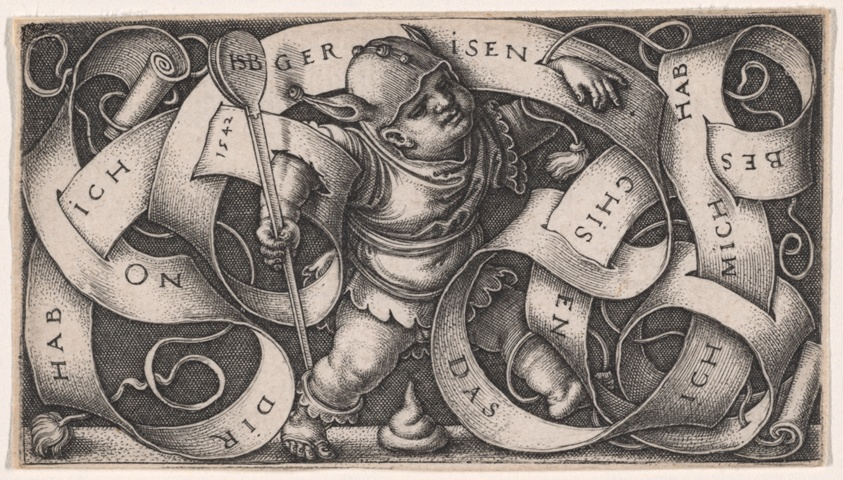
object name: Print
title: The Little Buffoon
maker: Sebald Beham; German, 1500-1550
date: 1542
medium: Engraving in black on cream laid paper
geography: Germany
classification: print; engraving; paper; prints and drawing